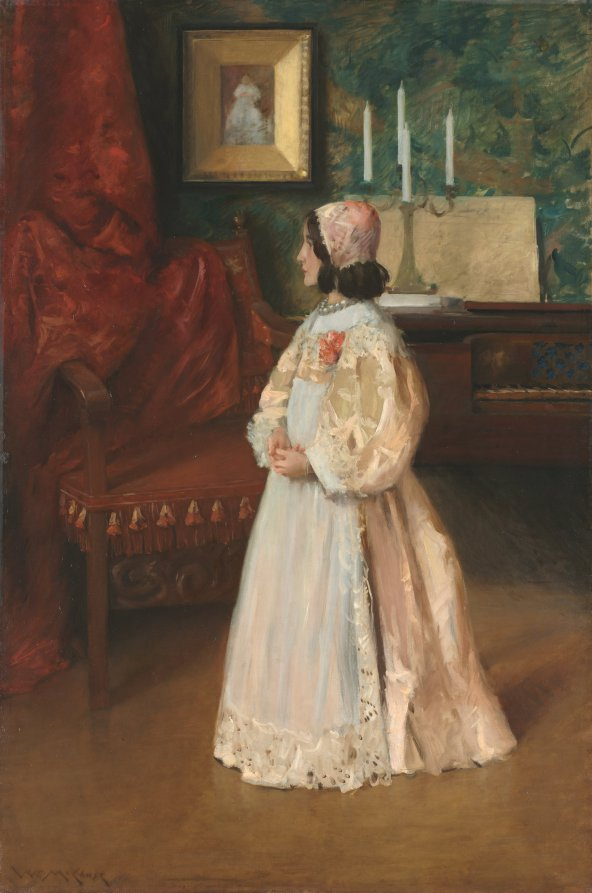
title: Portrait of My Daughter Alice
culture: America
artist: William Merritt Chase (American, 1849–1916)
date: c. 1895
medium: oil on canvas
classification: Painting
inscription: signed lower left: WM M. Chase [WM in monogram]